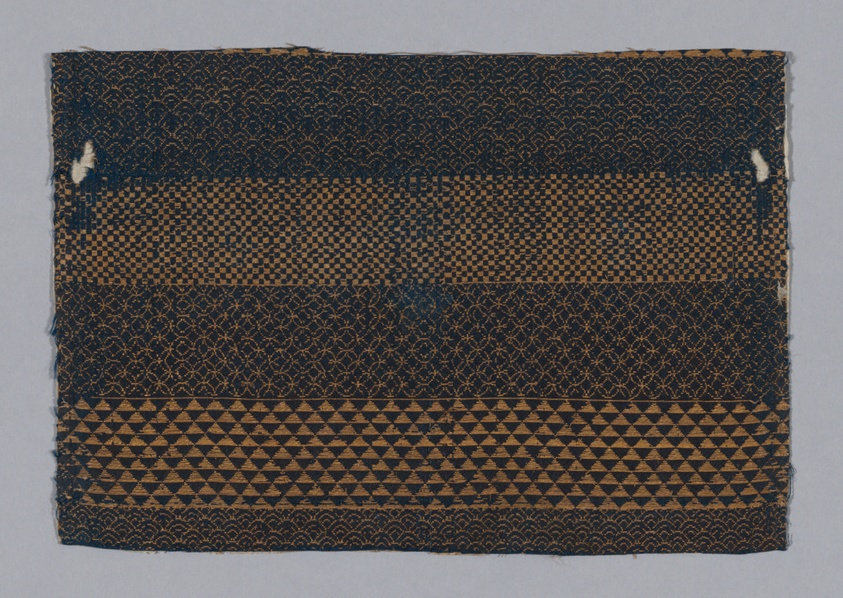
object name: Textile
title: Fragment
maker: Japan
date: 18th century, late Edo period (1789–1868)/ Meiji period (1868–1912)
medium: Plain compound twill, silk & gilt paper; 3 1/2 strips to m.m.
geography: Japan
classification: textile; weaving